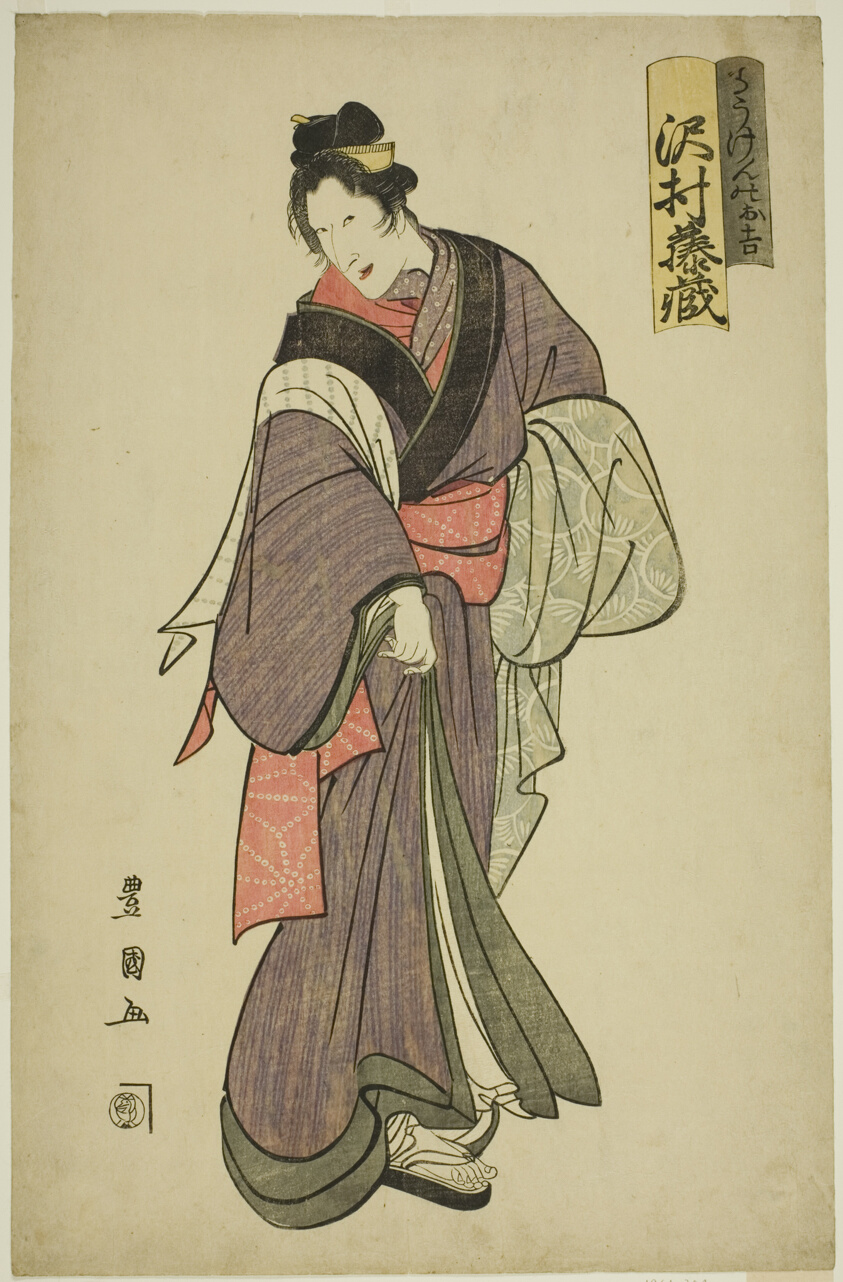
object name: Print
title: The actor Sawamura Tozo I as Dogen no Okichi in the play "Yoshiwara Niwaka no Banzuke," performed at the Ichimura Theater in the ninth month, 1804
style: Japanese (culture or style)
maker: Utagawa Toyokuni I 初代 歌川 豊国; Japanese, 1769–1825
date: 1804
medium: Color woodblock print; oban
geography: Japan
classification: woodblock print; print; asian art